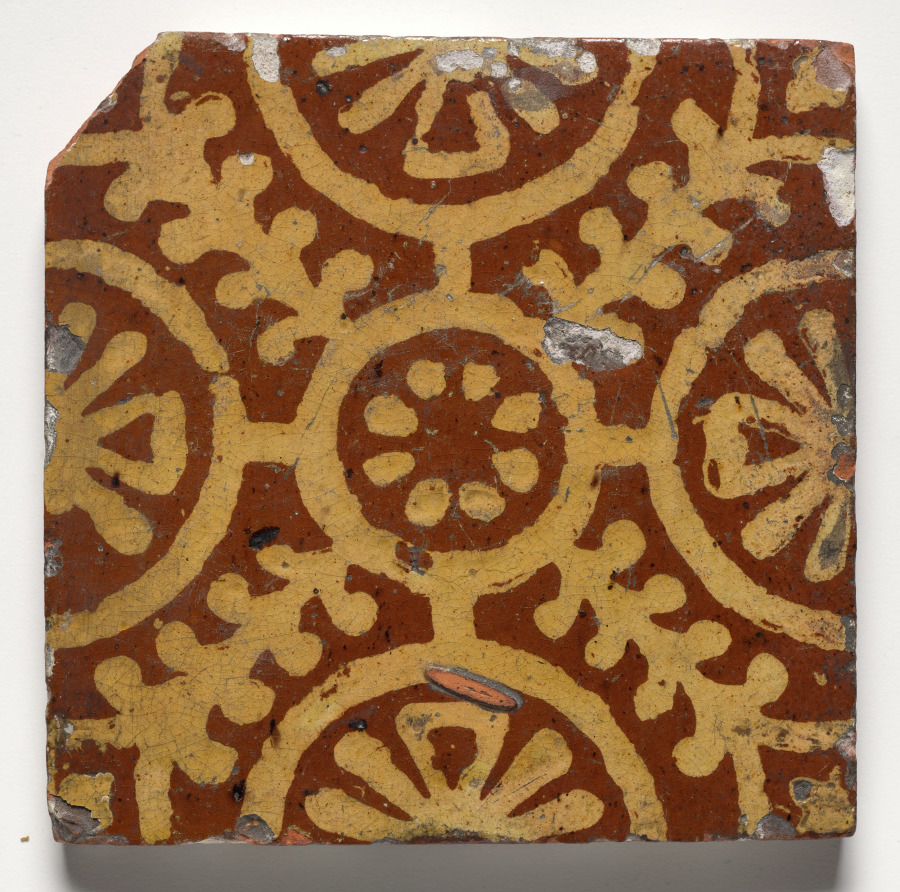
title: Tile- Foliated Pattern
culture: Netherlands, Holland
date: c 1500s–1600s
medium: glazed ceramic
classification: Ceramic